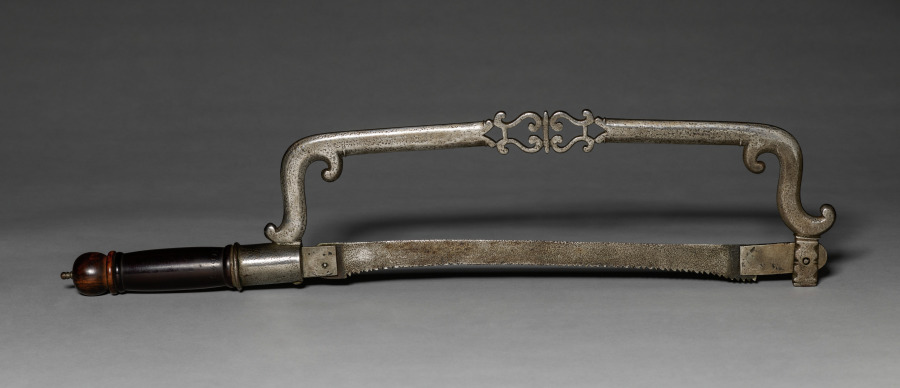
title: Hand Saw with Blade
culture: Europe, 18th century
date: 1700s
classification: Tool